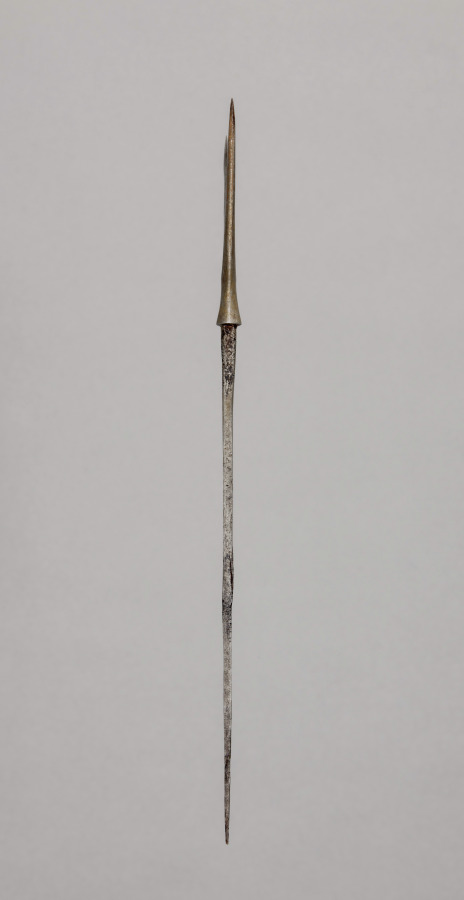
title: Arrow Point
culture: Japan, Edo period (1615–1868)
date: 1700s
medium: steel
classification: Arms and Armor